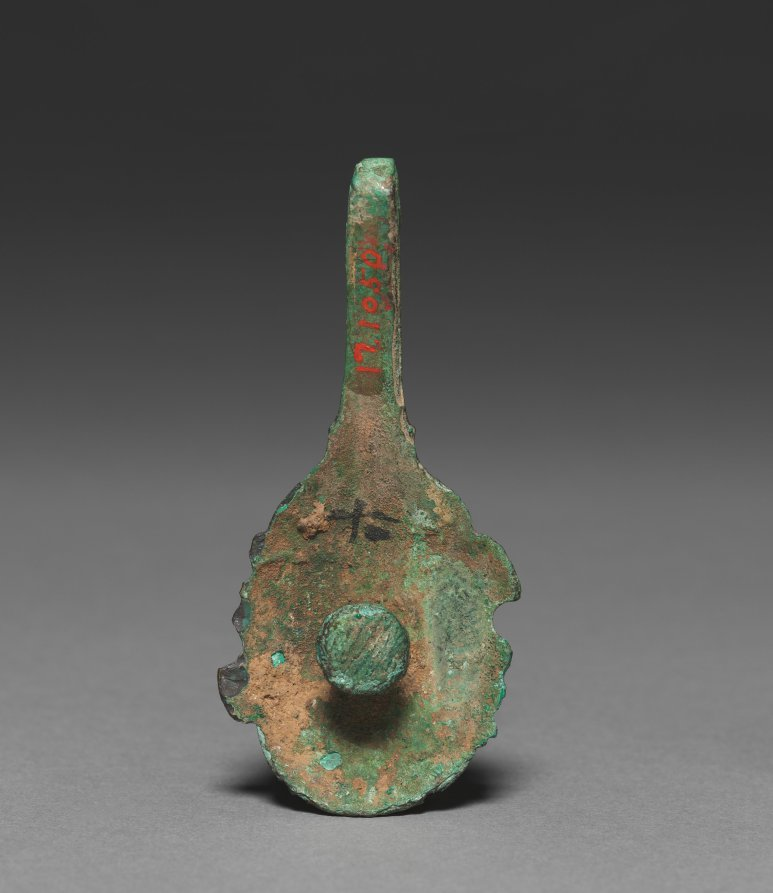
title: Clasp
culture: Korea, Goryeo dynasty (918–1392)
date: 918–1392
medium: bronze gilt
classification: Metalwork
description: Both everyday objects and ornaments such as this belt ornament were standard for Goryeo-period (918-1392) burial goods. Furnishing tombs with an elaborate assemblage of objects was believed to honor and comfort the newly dead. Generally, Goryeo tombs were left untouched until the late 19th century. During the colonial period (1910–45), however, Japanese archaeologists aggressively excavated the tombs located in Kaeseong, the former capital of the Goryeo period. Highly possibly came from one of those excavated tomb sites, this bronze ornament evokes a memory about the colonized Korea (1910-1945).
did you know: The Japanese antique dealer Yamanaka & Company, which opened its branches in New York (1895) and Boston (1899), sold small Korean archaeological materials such as this bronze ornament to American collectors in the early 20th century.